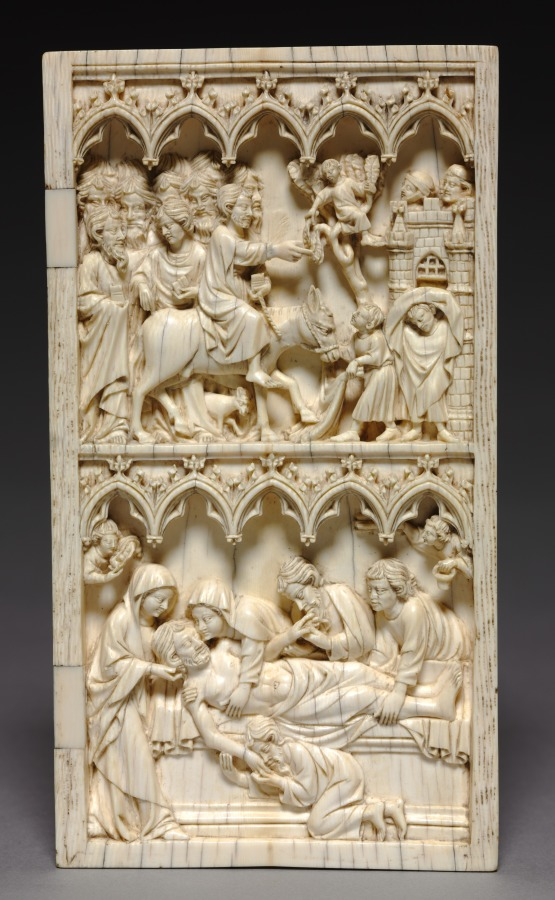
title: Diptych with Scenes from the Life of Christ (right wing: Entry into Jerusalem and Entombment)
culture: Germany, Thuringia or Saxony, 14th century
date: c. 1350–1375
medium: ivory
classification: Ivory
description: Ivory diptychs (two panels hinged together) were used for private devotion by their aristocratic owners. The scenes represented here are Christ’s Entry into Jerusalem, the Raising of Lazarus, the Crucifixion, and Christ’s Entombment. They suggest choices made by the original owner who wished to contemplate these aspects of Christ’s passion.